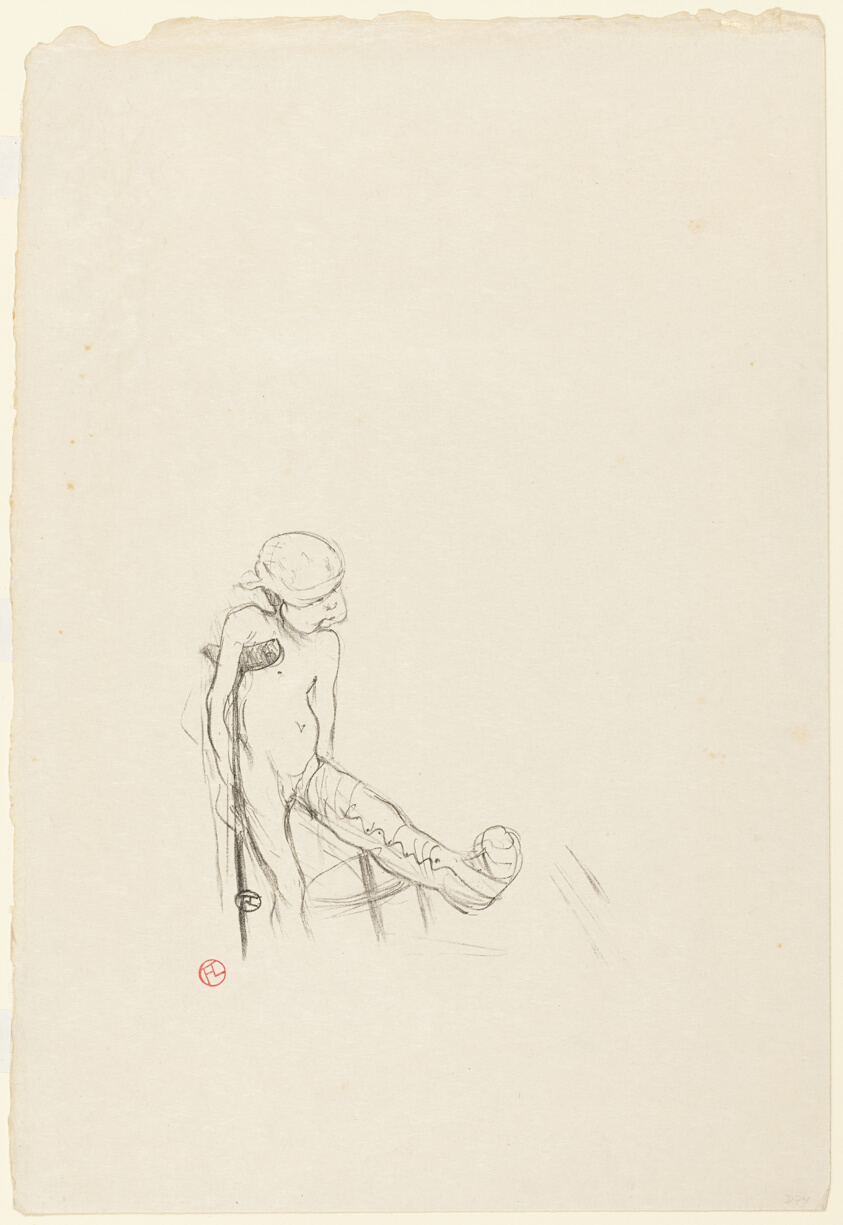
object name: Print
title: Eros vanné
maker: Henri de Toulouse-Lautrec (French, 1864-1901)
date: 1894, published before 1910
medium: Lithograph in black on cream Japanese paper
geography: France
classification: lithograph; print; prints and drawing